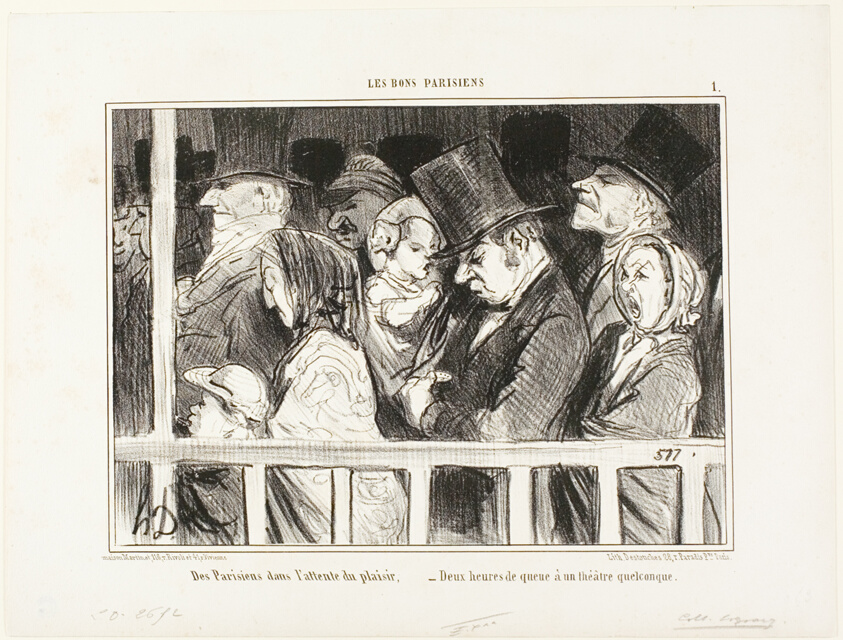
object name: Print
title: Parisians looking forward to some fun. Queuing up for two hours in front of any theater in town, plate 1 from Les Bons Parisiens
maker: Honoré Victorin Daumier; French, 1808-1879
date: 1855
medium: Lithograph in black on white wove paper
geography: France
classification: lithograph; print; prints and drawing